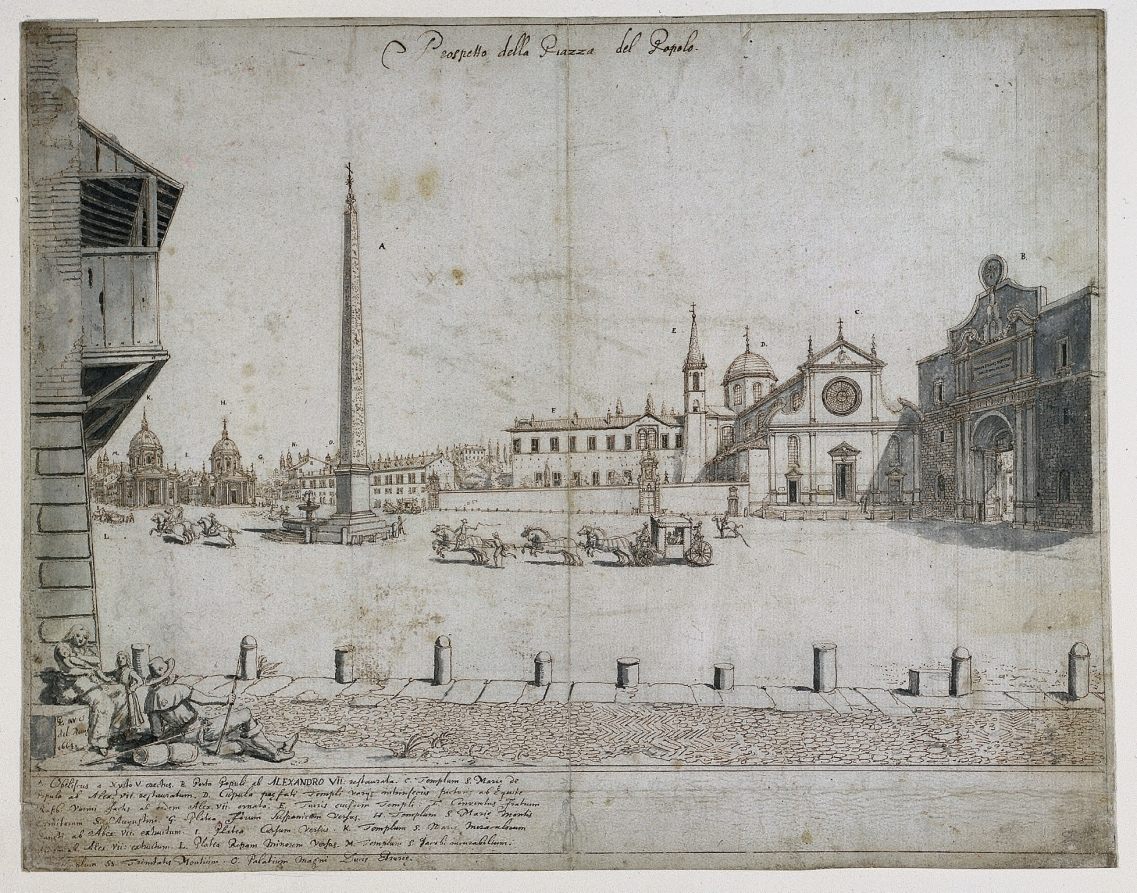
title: Eighteen Views of Rome: The Piazza del Popolo (recto)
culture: Flanders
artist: Lievin Cruyl (Flemish, c. 1640-c. 1720)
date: 1664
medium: pen and brown ink and brush and gray wash over stylus and graphite; framing lines in brown ink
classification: Drawing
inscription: signed, lower left, in brown ink: [artist monogram: CL]. INV. et / del: Romæ / 1664. ; by artist, upper center, in brown ink: Prospetto della Piazza del Popolo. ; by artist, throughout composition, in brown ink: [the letters A-O] ; by artist, lower left, in brown ink: A. Obeliscus a Xysto V. erectus. B. Porta Populi ab ALEXANDRO VÎÎ: restaurata. C. Templum S. Maria de / Populo ab Alex. vii. restauratum. D. Cupula praefati Templi varijs intrinsecùs picturis ab Equite / Raph: Vanni factis ab eodem Alex. vii. ornata. E.Turris eiusdem Templi. F. Conventus Fratrum / Eremitarum S. Augustini. G. Platea Forum hispanicum Versus. H. Templum S. Mariæ Montis / Sancti ab Alex: vii. extructum. I. Platea Cursum Versus. K. Templum S. Mariæ Miraculorum / [illegible]dem ab Alex. vii: extructum. L. Platea Ripam Minorem Versus. M. Templum S. Jacobi incurabilium. / [N. Tem]plum SS. Trinitatis Montium. O. Palatium Magni Ducis Etruriæ. ; lower center, in graphite: L[illegible] ; lower right, in graphite: 2